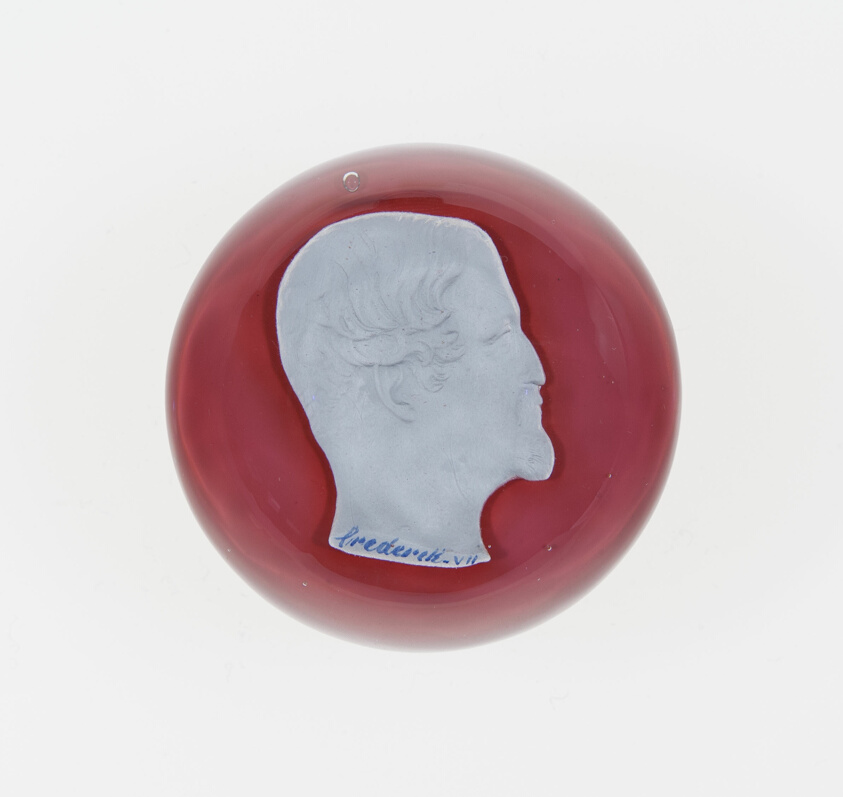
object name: Glass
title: Paperweight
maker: Clichy Glassworks (Cristalleries de Clichy); Clichy, France, 1837-1885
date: Mid 19th century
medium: Glass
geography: Clichy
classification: paperweight; glass